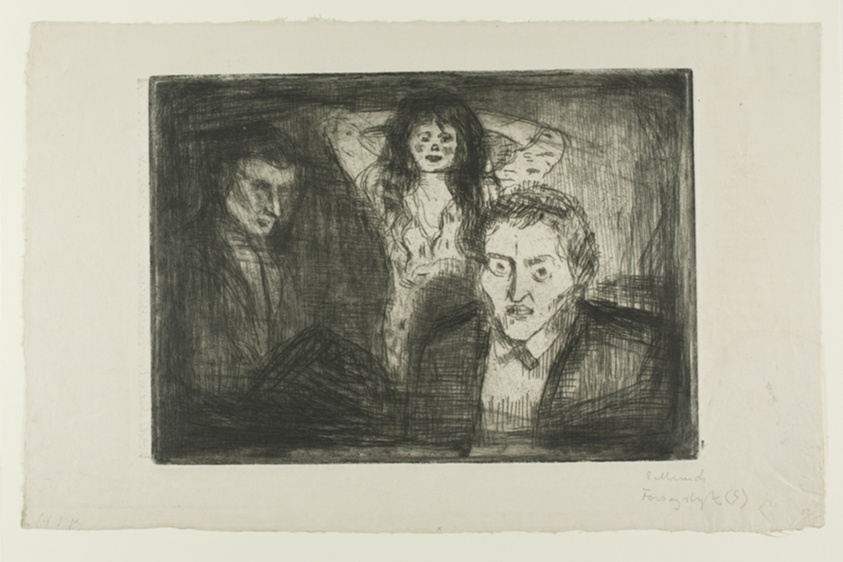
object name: Print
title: Jealousy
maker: Edvard Munch (Norwegian, 1863-1944)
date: 1914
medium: Etching and drypoint on cream wove paper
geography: Norway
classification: etching; print; prints and drawing